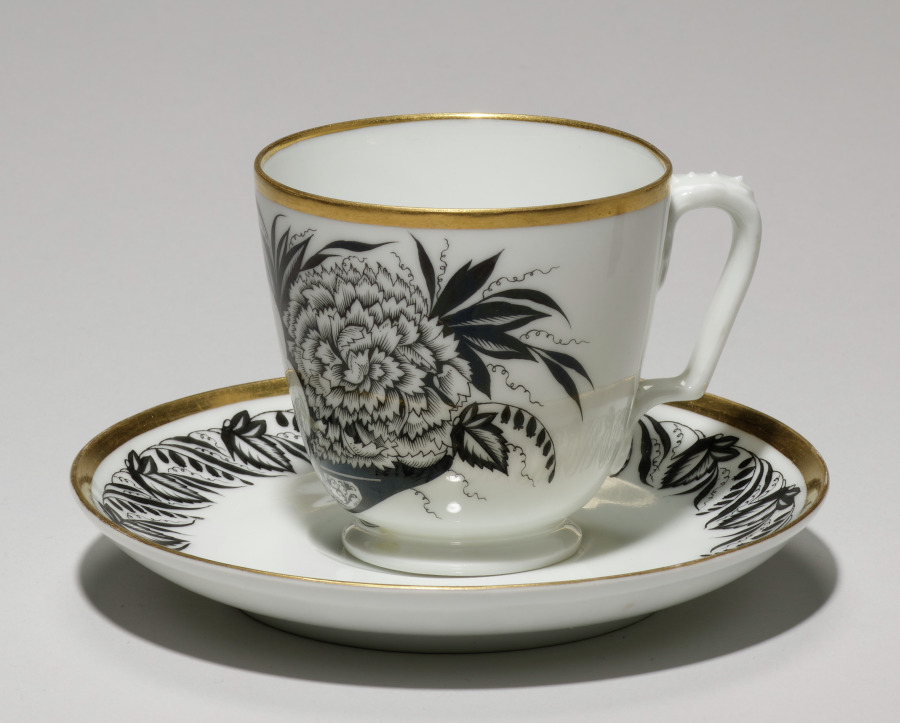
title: Cup and Saucer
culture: Russia, St. Petersburg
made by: St. Petersburg Imperial Porcelain Factory (Russian)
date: 1881–1917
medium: porcelain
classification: Ceramic